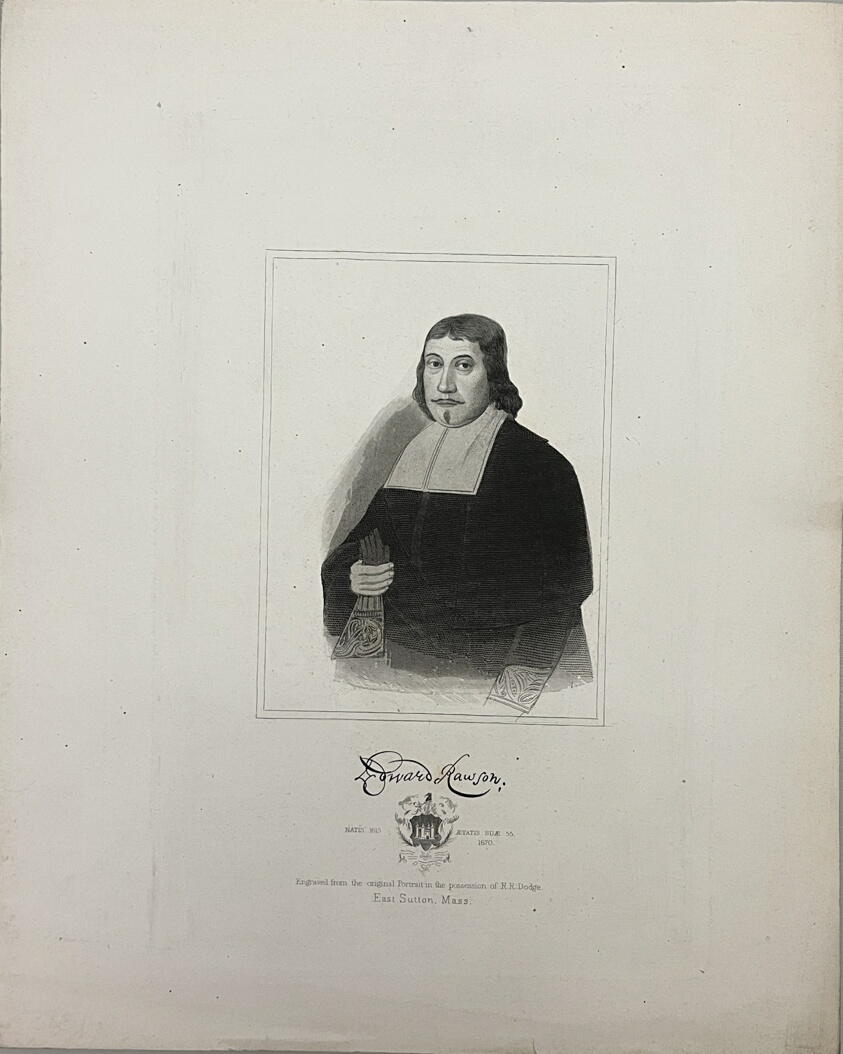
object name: Print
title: Edward Rawson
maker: Artist Unknown (Likely American, 19th century); after Freake-Gibbs Painter (American, active 1670s)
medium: Steel engraving on paper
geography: United States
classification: reproduction; print; prints and drawing